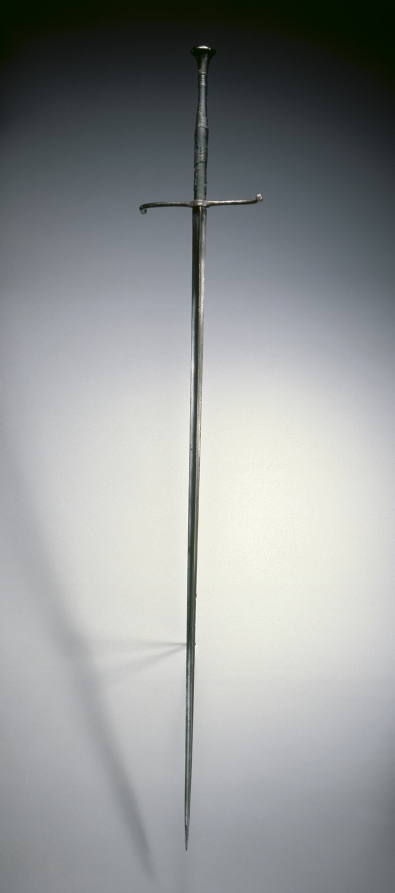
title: Estoc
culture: Germany, early 16th Century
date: early 1500s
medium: steel, wood and leather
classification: Arms and Armor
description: The French word estoc means "thrust" and therefore was adopted as the name for this long thrusting sword. It has a fairly long grip and simple cross-shaped hilt. The rigid blade, designed for thrusting at armored opponents, is three-sided for strength. The estoc was sometimes carried from the saddle. From the early 1300s, it was used by cavalrymen as an auxiliary side arm when a horseman had dismounted.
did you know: Swords like this one were developed to counteract and pierce the increasingly heavy armor and sophisticated plates that nearly covered a knight.